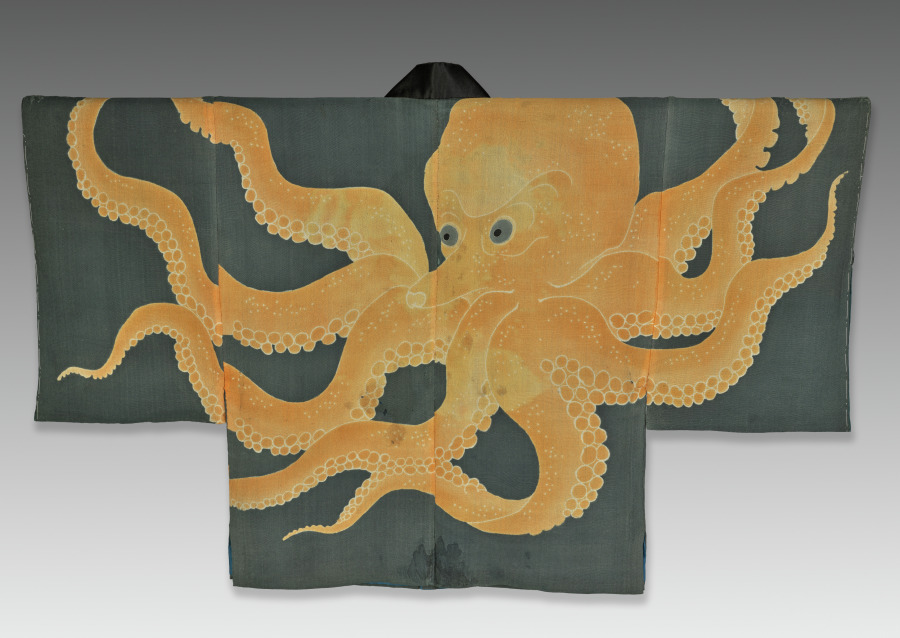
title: Jacket with Octopus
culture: Japan, Edo period (1615–1868)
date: c. 1800–1868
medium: Silk crepe (chirimen)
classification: Textile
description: With its many long arms, the octopus lends itself to a tantalizing design, with the front of this garment displaying tentacles and the back revealing the face. An octopus motif sometimes appears on costumes for the role of the Catfish Priest, a sidekick of the main villain in the Kabuki play Shibaraku (Stop a Moment!). It is also seen in genre painting during the 1600s as a logo on the uniforms of transportation staff, perhaps indicating just how much they can carry. This jacket may have recycled the idea as a fashion statement.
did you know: Crepe results from the weft thread being kept tighter than the warp thread during weaving.